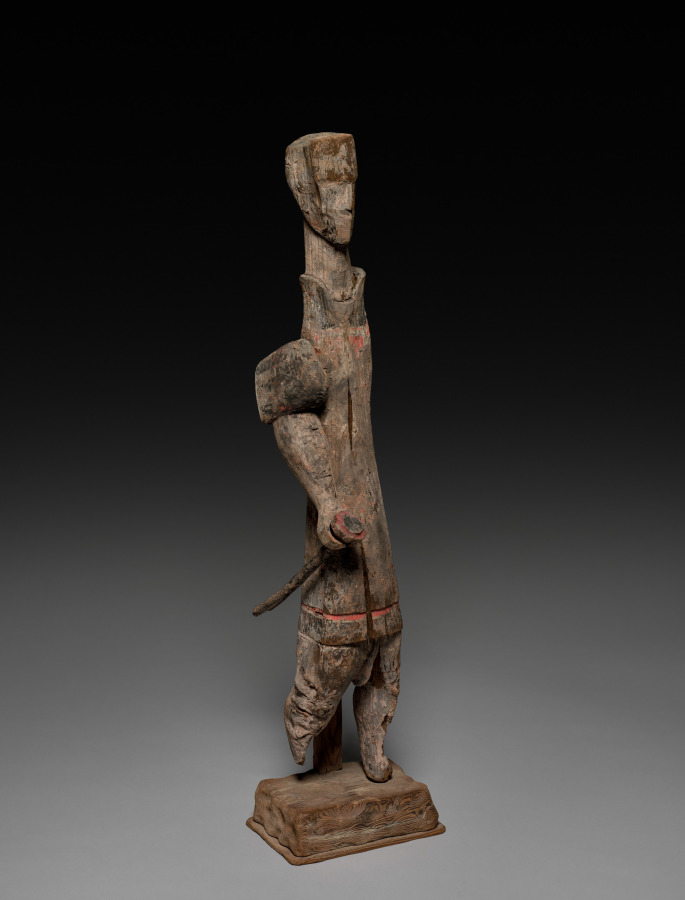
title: Figure with Sword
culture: China, Eastern Zhou dynasty (770–256 BCE), Warring States period (475–221 BCE)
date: 400–300 BCE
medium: wood with traces of polychromy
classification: Sculpture